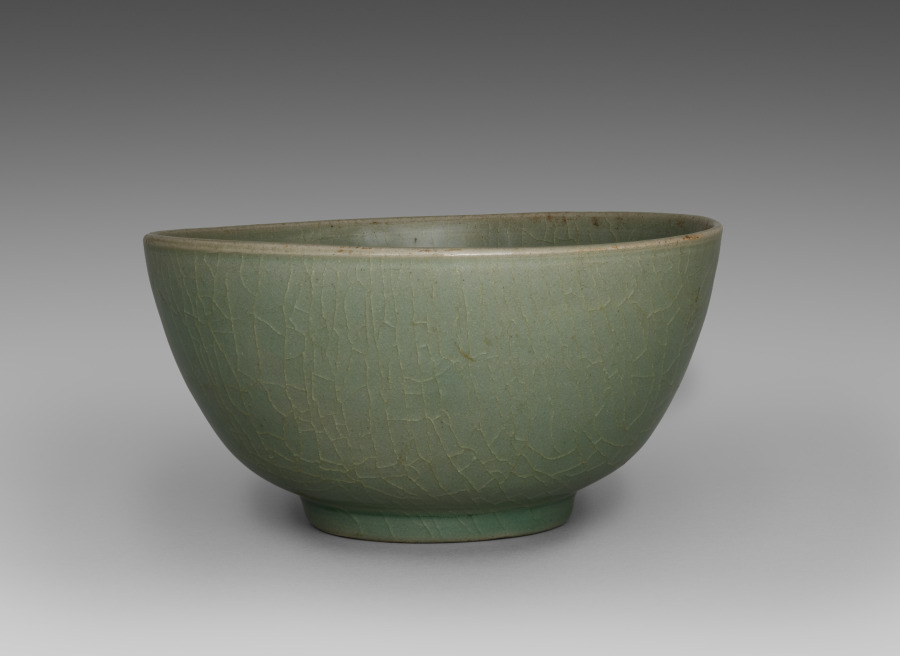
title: Celadon Bowl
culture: Korea, Goryeo dynasty (918–1392)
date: 1200s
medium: Celadon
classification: Ceramic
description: As early as the seventh century, the practice of drinking tea and wine became an important part of elite leisure culture in Korea. A wide bowl like this example was especially suitable for drinking powdered tea shaved from a compressed tea cake, the most commonly enjoyed type during the Goryeo period.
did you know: Crackling occurs when the glaze contracts more rapidly than the clay body during the firing process. In the context of celadon bowls, this phenomenon is not regarded as a flaw but rather as a highly valued aesthetic feature—one that evokes a sense of age.